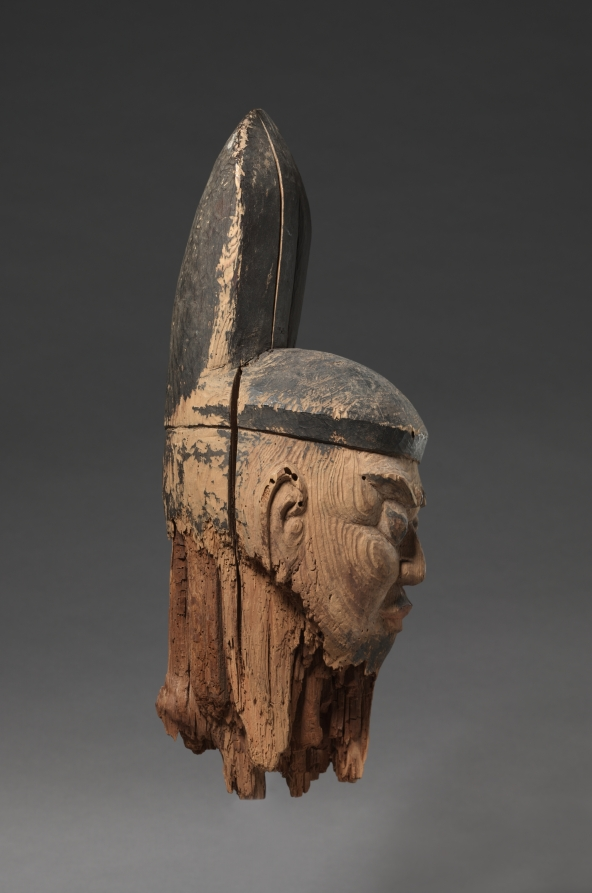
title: Head of a Male Shinto Deity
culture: Japan, Heian period (794–1185)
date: 900s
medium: wood with lacquer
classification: Sculpture